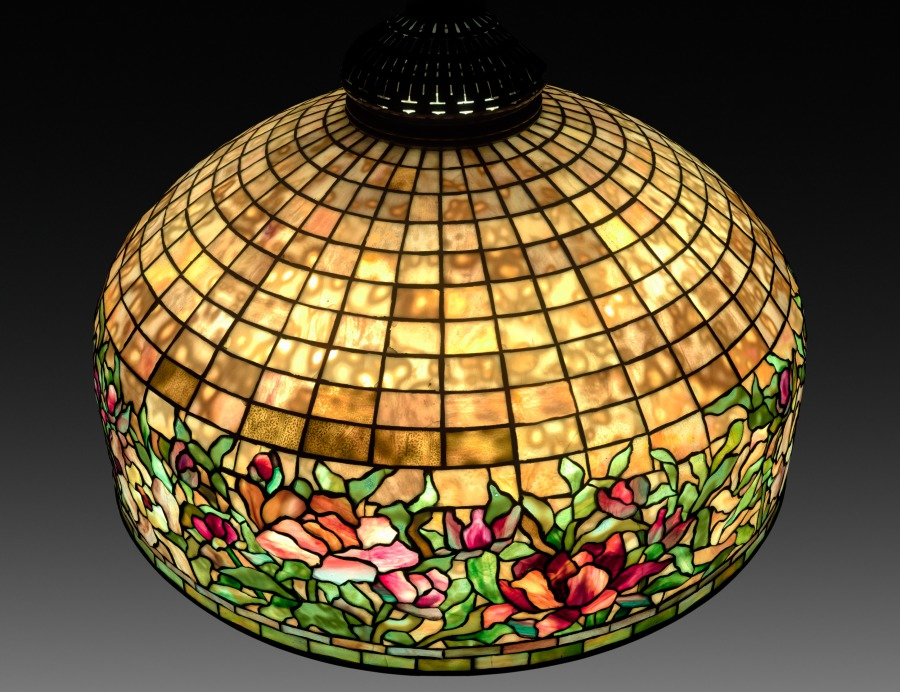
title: Peony Border Floor Lamp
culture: America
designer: probably by Clara Wolcott Driscoll (American, 1861–1944)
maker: Tiffany Studios (United States, New York, 1902–32)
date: c. 1905–10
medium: leaded glass, bronze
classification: Lamp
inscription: Shade impressed: TIFFANY STUDIOS NEW YORK 1574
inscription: Base impressed: TIFFANY STUDIOS/NEW YORK/376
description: In the 1870s a renewed emphasis on natural landscapes ushered in a generation of cottage gardeners who delighted in planting perennials in large quantities. Louis Comfort Tiffany was among those who championed the lush, sometimes wild-looking displays of varied floral species in the garden at his Long Island estate, Laurelton Hall. Tiffany encouraged his designers to take inspiration from his garden by shipping fresh cuttings almost weekly to his studios. Ohio native Clara Wolcott Driscoll and her team of female designers created floral patterns for lamps and mosaics based on the colorful blooms of spring that became among the most sought after and commercially successful of Tiffany’s production.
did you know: Standing floor models of this size were among the most expensive of Louis Comfort Tiffany's lamps.